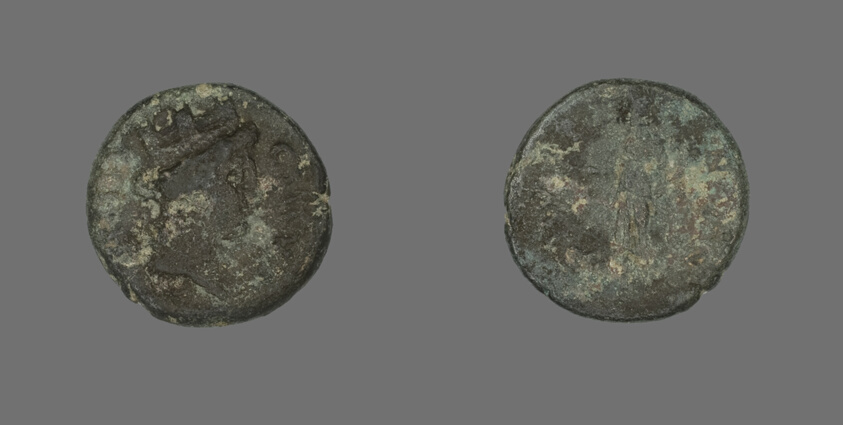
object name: Coin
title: Coin Depicting the Goddess Tyche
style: roman (ancient, style or period)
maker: Roman; Smyrna, Ionia (now Izmir, Turkey)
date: 98-117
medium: Bronze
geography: Smyrna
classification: coin; ancient art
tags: goddesses